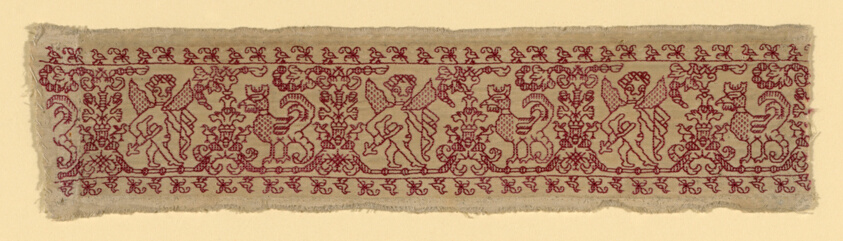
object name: Textile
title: Border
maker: Italy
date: 17th century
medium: Linen, plain weave; embroidered with silk floss in back, hem and running stitches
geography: Italy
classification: textile; needlework (visual works)